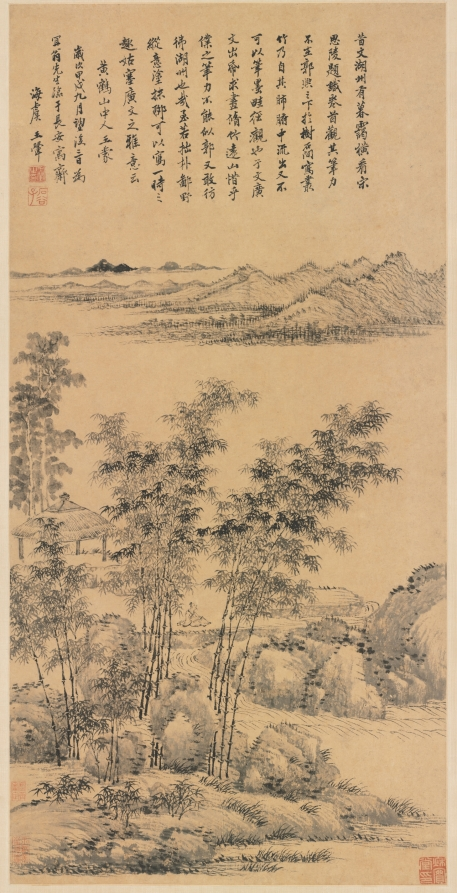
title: Tall Bamboo and Distant Mountains, after Wang Meng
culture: China, Qing dynasty (1644-1911)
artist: Wang Hui (Chinese, 1632–1717)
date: 1694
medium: Hanging scroll; ink on paper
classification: Painting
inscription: 昔文湖州有暮靄橫看。宋思陵題識卷首：觀其筆力不在郭煕之下。於樹石間寫叢竹，乃自其肺腑中流出，又不可以筆墨畦徑觀也。 子文廣文出紙求畫修竹遠山。惜乎僕之筆力，不能似郭。又敢彷彿湖州也哉？至若拙朴鄙野，縱意塗抹，聊可以寫一時之趣。姑塞廣文之雅意云。黃鶴山中人王蒙書。 歲次甲戌九月望後三日為冝翁先生臨于長安寓齋。海虞, 王翬。[印]王翬之印; 石谷子.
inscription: 3 additional seals: 1 of Pang Yuanji 龐元濟 (1864–1949); 2 unidentified.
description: Wang Hui studied paintings by earlier masters and digested their styles with unceasing virtuosity. He had such enduring affection for a landscape by Wang Meng 王蒙 (about 1308–85) that between 1686 and 1712, he made several copies, like this example. One of his compositional transformations here was moving the scholar from the pavilion directly into the landscape by the stream. His faithful copying also included inscriptions. Wang Meng had written that he was trying to resuscitate the style of an earlier artist, Wen Tong (1018–1079); therefore, Wang Hui sought to revive both Wang Meng and Wen Tong.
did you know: As a leading figure in the Orthodox School of Chinese painting, Wang Hui believed that the act of painting was a dialogue with one or more masters of the past.